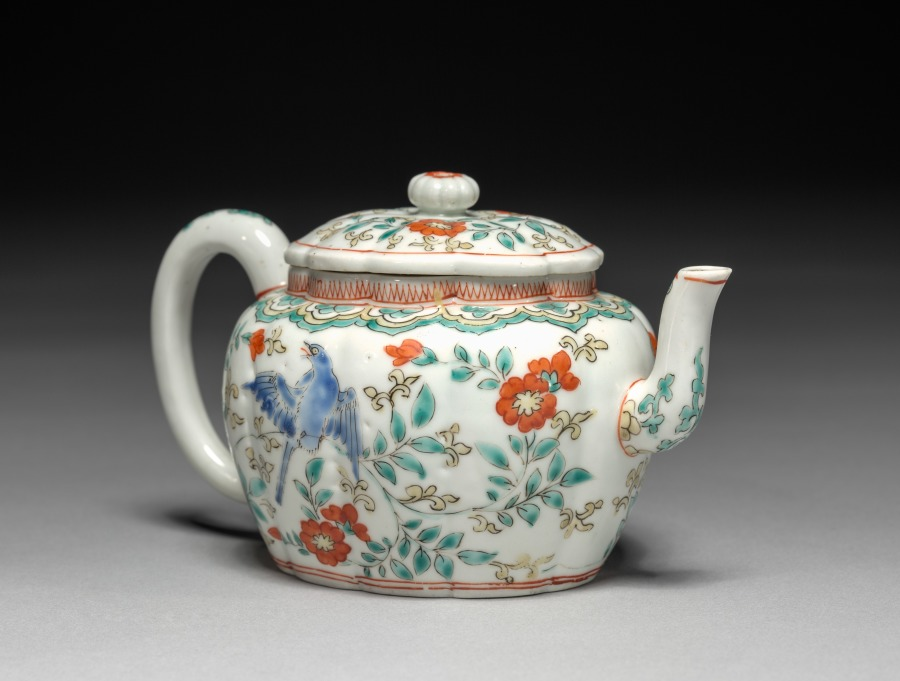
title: Teapot with Birds and Flowers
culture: Japan, Edo period (1615–1868)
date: 1700s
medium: Porcelain with overglaze color enamel (Arita ware)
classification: Ceramic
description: This small vessel was likely made as a teapot for the European export market. The different colored overglaze enamels, orange, blue, green, and yellow, combine with a wiry black outline to form the design of a singing bird on a flowering bough repeated on each side of the pot.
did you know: The wood storage box for this pot refers to it as a suichū, which means water ewer.